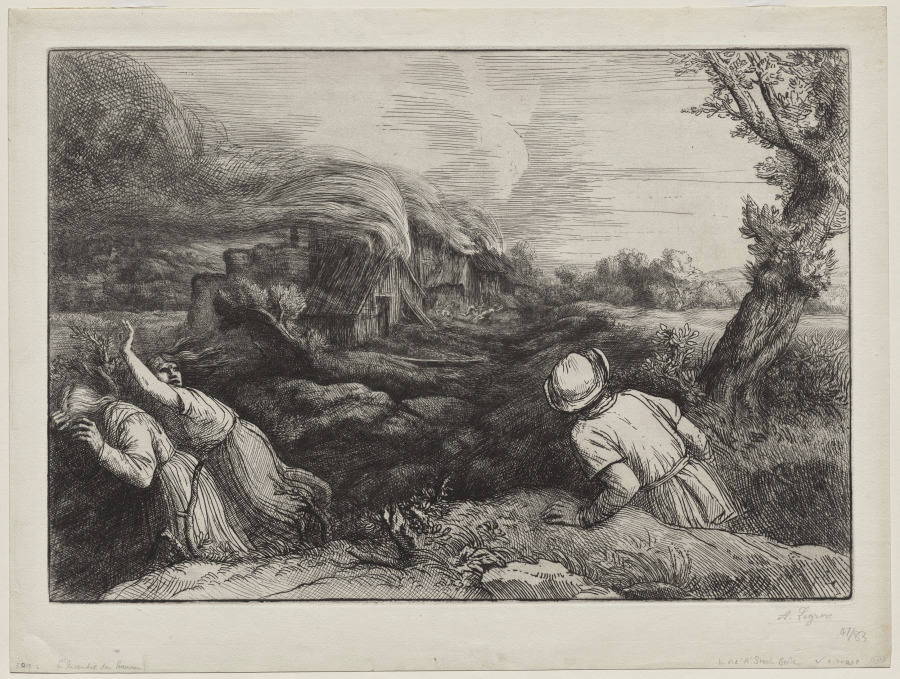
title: The Village in Flames (L'Incendie du Hameau)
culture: France, 19th century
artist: Alphonse Legros (French, 1837–1911)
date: 1893–1894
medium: etching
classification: Print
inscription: lower right, below image, in graphite: "A. Legros"; bottom left corner: "509, L'Incendie du Hameau"; lower right: "In Old A Stock Book, 47/83, A.24268"